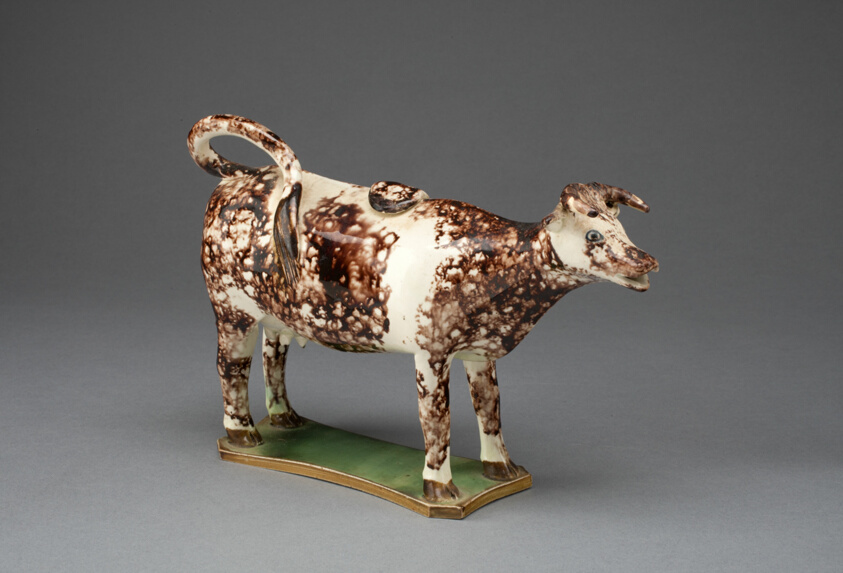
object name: Ceramics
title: Cow Creamer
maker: Staffordshire, England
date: 1770/95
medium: Lead-glazed earthenware (creamware)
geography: Staffordshire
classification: earthenware; lead-glazed earthenware; creamware; european decorative arts; ceramics